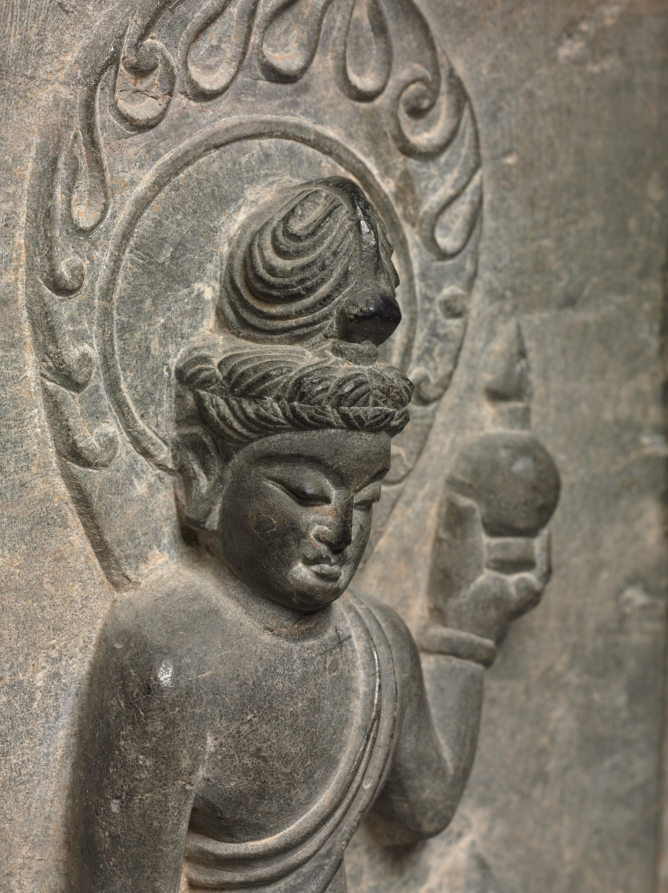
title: Section of a Dharani Pillar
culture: China, Tang dynasty (618-907)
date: 618–907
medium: limestone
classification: Sculpture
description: This octagonal stone pillar, with Buddhist figures carved on its eight sides, is part of a dharani pillar commissioned by Buddhist believers to pay tribute to the dead. The eight inscriptions seen here are eulogies dedicated by eight families to their deceased family members. Dharanis were a form of spell in Esoteric Buddhism said to possess supernatural power when being recited or carried and were incorporated into sutras, such as the Buddha Usnisa Vijaya Dharani Sutra. Dharani pillars, also called sutra pillars, became the dominant bearers of Usnisa Vijaya Dharani which supposedly helped sentient beings prolong life and destroy hardships of the eternal cycle of life and the realms of hell.